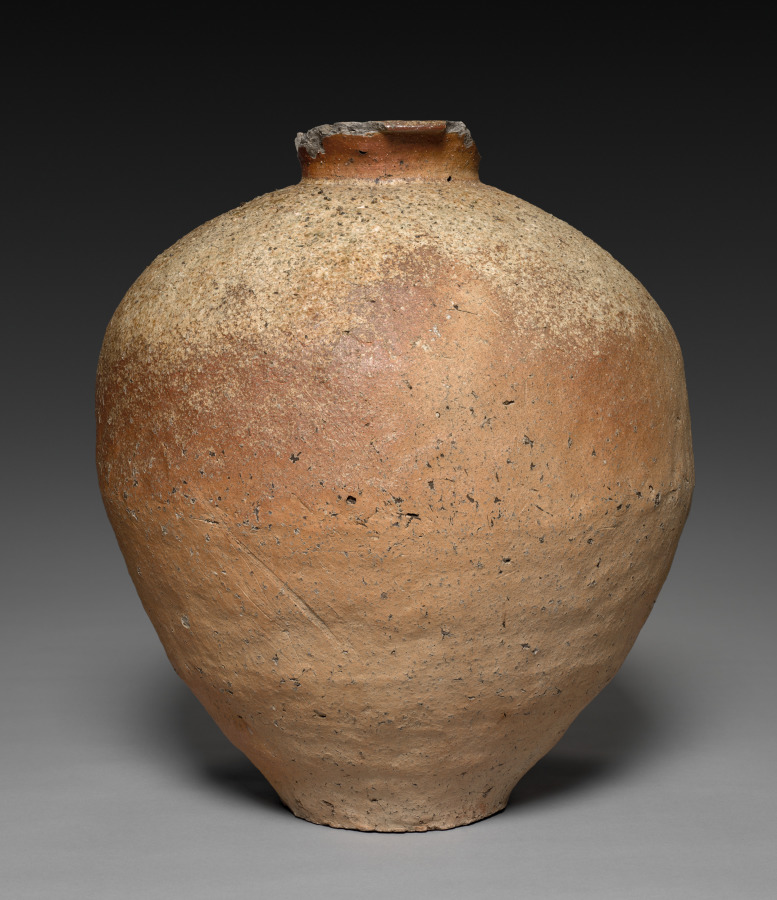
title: Storage Jar (Tsubo)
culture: Japan, Muromachi period (1392–1573)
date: 1400s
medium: stoneware with natural ash glaze (Shigaraki ware)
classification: Ceramic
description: This bulbous clay jar, with its expansive, dry orange-brown surface, white dots of feldspathic stone, and spidery crazing marks epitomizes one type of medieval ware from Shigaraki. This region east of Kyoto and north of the older cultural and religious center of Nara has long been known as a source of superior clay material. Shigaraki storage jars were crafted for strength and durability. The vessel's slightly lopsided shape shows precisely where its three lower clay sections connect with one another. The "stubble" on the upper shoulder sections is highlighted by dripping rivulets of dull-green ash glaze in one small area on the broken neck. The same natural glaze runs over the slope of the shoulder and also appears as a large splash of thin, glossy olive green where the shoulder joins the upper body.